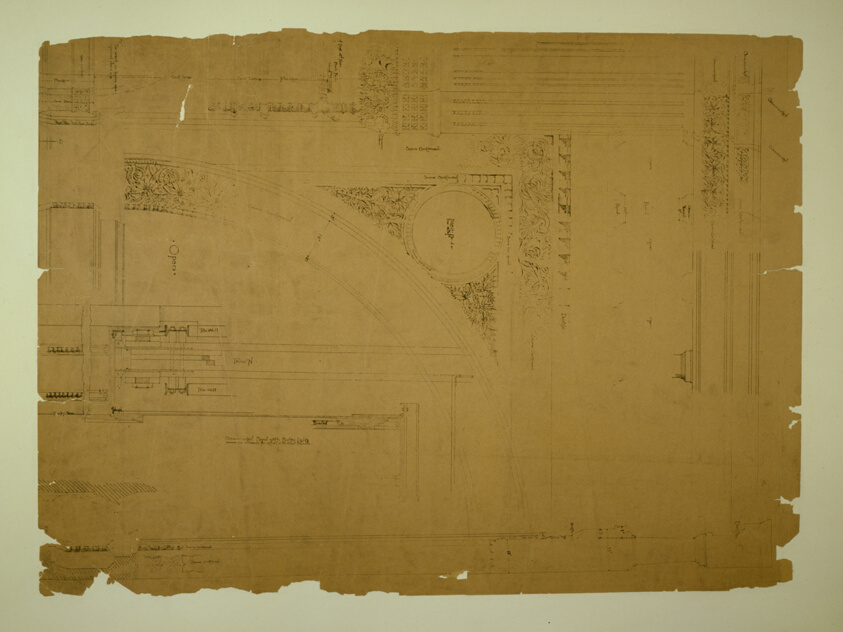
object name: Architectural Drawing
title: Auditorium Building, Chicago, Illinois, Plaster Details with Electric Lights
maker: Adler and Sullivan; American, 1883–1895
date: c. 1887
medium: Hectograph print on paper mounted on board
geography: Chicago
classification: architectural drawing; architecture